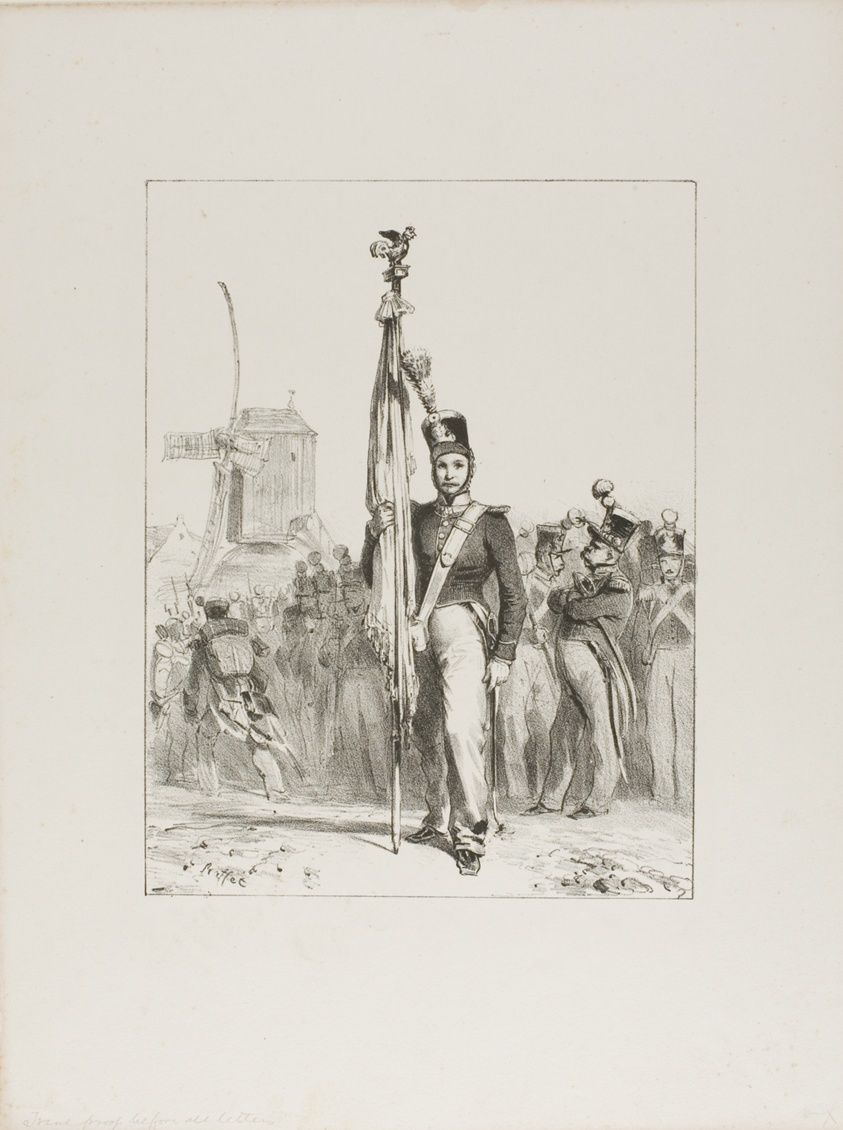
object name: Print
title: Light Infantry, Standard-Bearer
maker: Denis Auguste Marie Raffet (French, 1804-1860)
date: 1830–33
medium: Lithograph in black on ivory wove paper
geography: France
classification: lithograph; print; prints and drawing